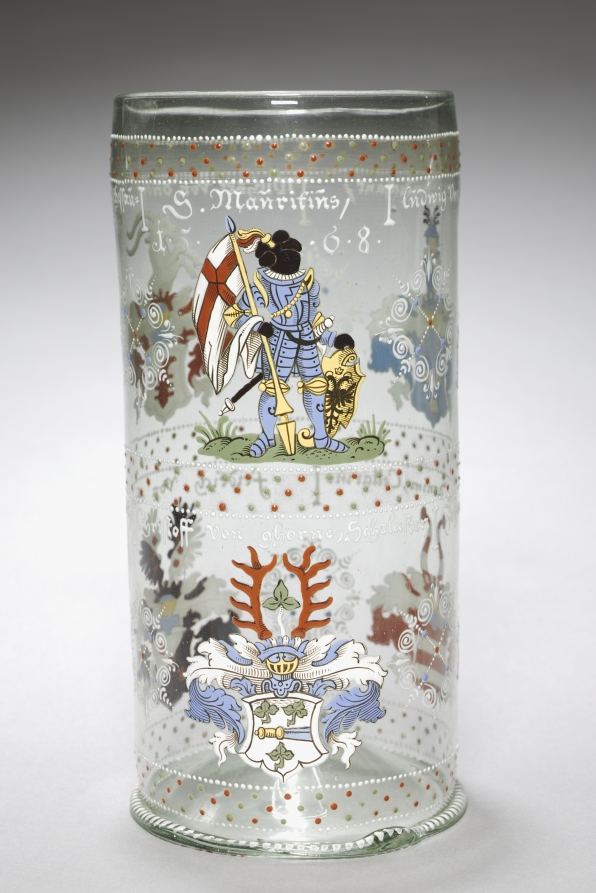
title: Beaker (Humpen)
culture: Germany, probably Bohemia, 16th century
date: 1568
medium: enameled glass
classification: Glass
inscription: LUDWIG VON LOCHOW, DOMDECHANT (dean of a cathedral); JOHAN VON ARNIM, CELLARIUS (a steward of a religious order); CHRISTOFF VON GHORNE, SCHOLASTER (a scholastic).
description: This humpen once belonged to the Chapter of Magdeburg Cathedral. On the upper register is the figure of St. Mauritius, patron saint of Magdeburg and the inscription S. Mauritius, 1568. Armorial shields are accompanied by names of members of the cathedral chapter.